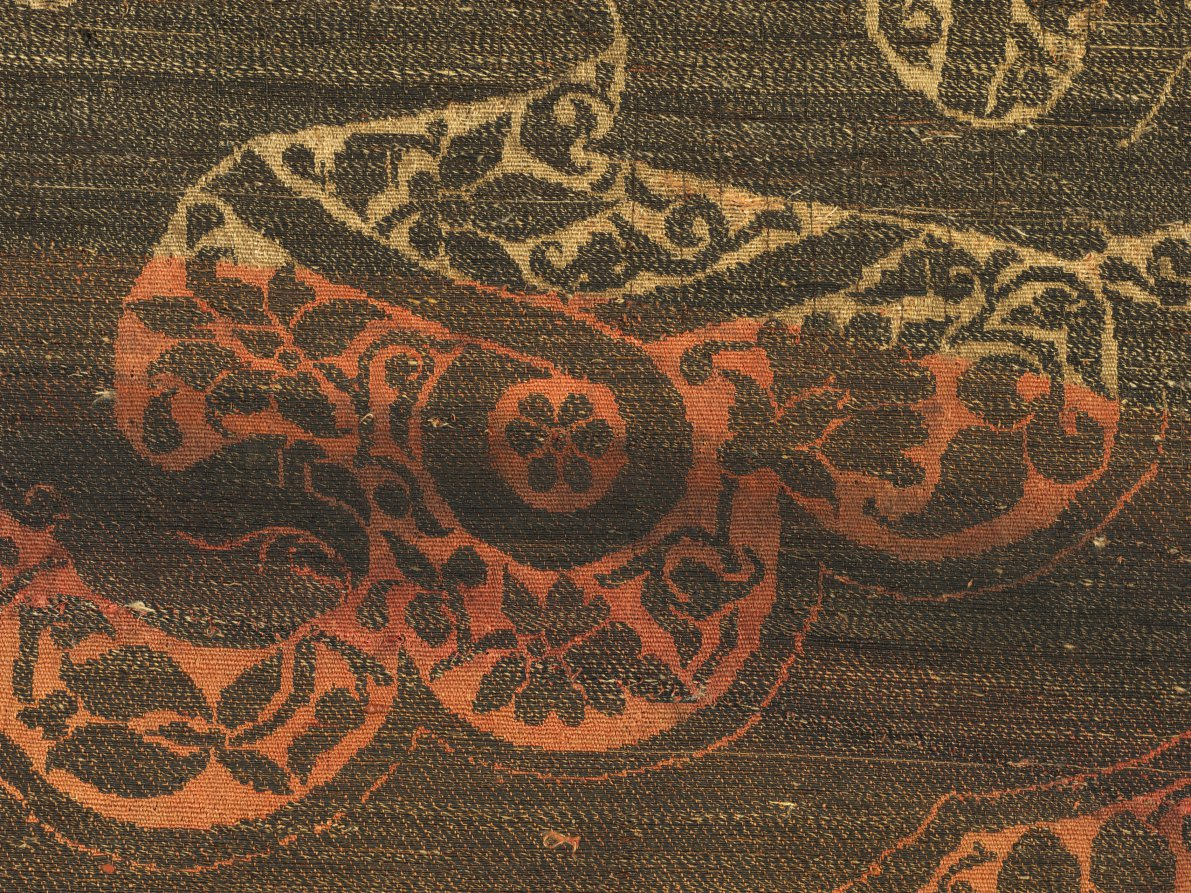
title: Cloth of gold with felines and eagles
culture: Northeast Iran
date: 1225–75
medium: Silk and gold thread: lampas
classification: Textile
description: Mongol taste for luxury was equated with gold, symbol of imperial authority, power, and legitimacy. This splendid cloth of gold-exceptionally large and luxurious-may have enriched the interior of a palace or a majestic tent. The golden pattern, although tarnished on the faded red silk ground, features scalloped medallions with felines whose long tails terminate in dragons’ heads amid elegant floral vines. Double-headed eagles form interstitial motifs on the floral ground. A radiant gold-on-gold band of pseudo-Arabic script enriches the top, woven with gold strips wrapped around a silk core on a ground of flat strips of gold, immediately beneath the pattern testing area.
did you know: Mongol cloths of gold, called nasji, incorporate Iranian, Central Asian, and Chinese features, reflecting the effects of gift exchanges and international commerce.